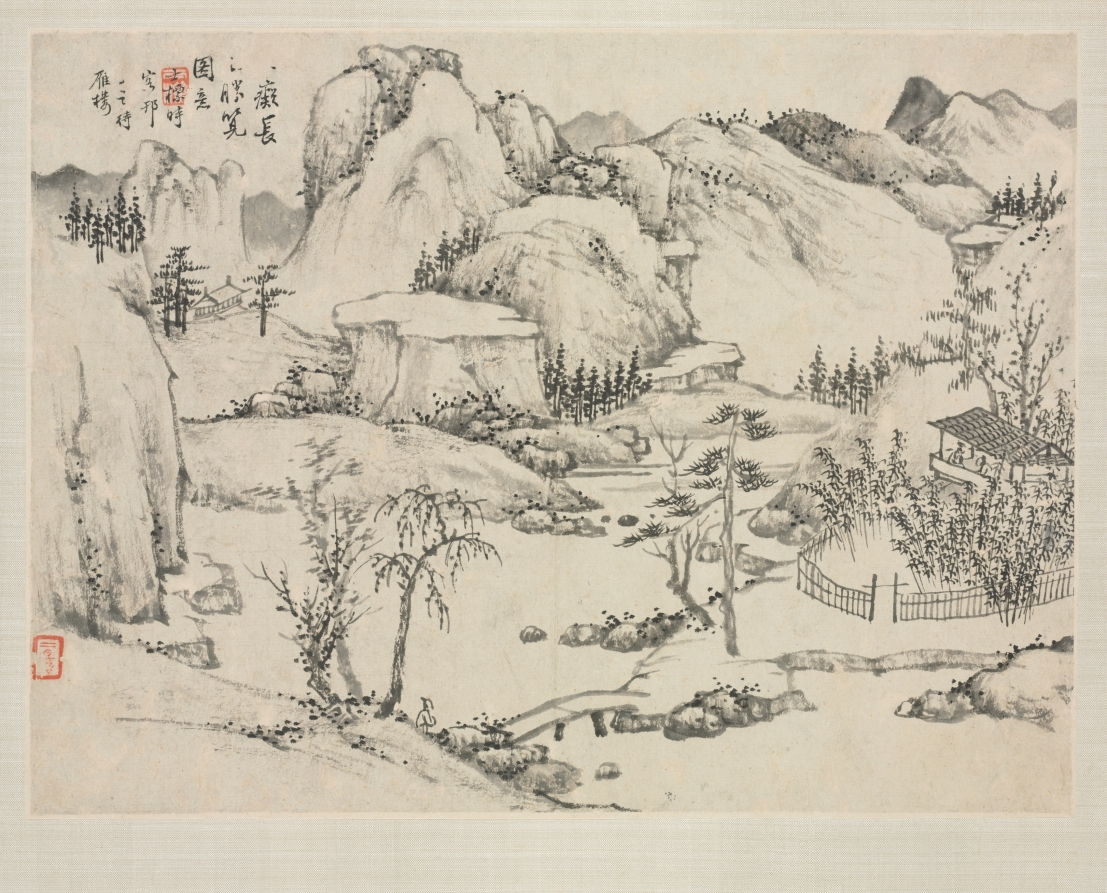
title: Landscape Album in Various Styles: Scenery of Mt. Changbai after Huang Gongwang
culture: China, Qing dynasty (1644-1911)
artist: Zha Shibiao (Chinese, 1615–1698)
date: 1684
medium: album leaf, ink and light color on paper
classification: Painting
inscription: Artist's inscription, signature, and 2 seals: After the idea of Yangzi River Scenery by Dachi 大癡 [Huang Gongwang 黃公望 (1269-1354)]. [seal] Shibiao. Shibiao, while visiting the Daiyan lou [Tower of Waiting for the Wild Geese] at Yangzhou [seal, lower left] Erzhan 二瞻.